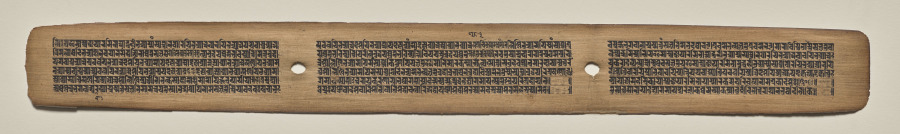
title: Text, Folio 88 (recto), from a Manuscript of the Perfection of Wisdom in Eight Thousand Lines (Ashtasahasrika Prajnaparamita-sutra)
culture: Eastern India, Bihar, Vikramashila Monastery. Painting: Nepal, Kathmandu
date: Sunday, September 14, 1119 (year 239 of the Newar Samvat in the month of Ashvina)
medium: gum tempera and ink on palm leaves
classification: Painting